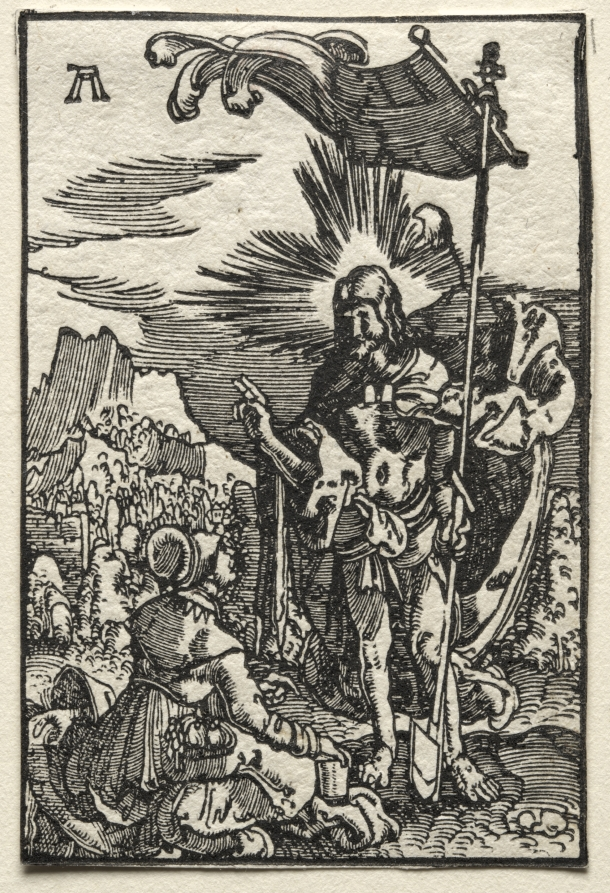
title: The Fall and Redemption of Man: Christ Appearing to St. Mary Magdalen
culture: Germany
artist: Albrecht Altdorfer (German, c. 1480–1538)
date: c. 1515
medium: woodcut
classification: Print